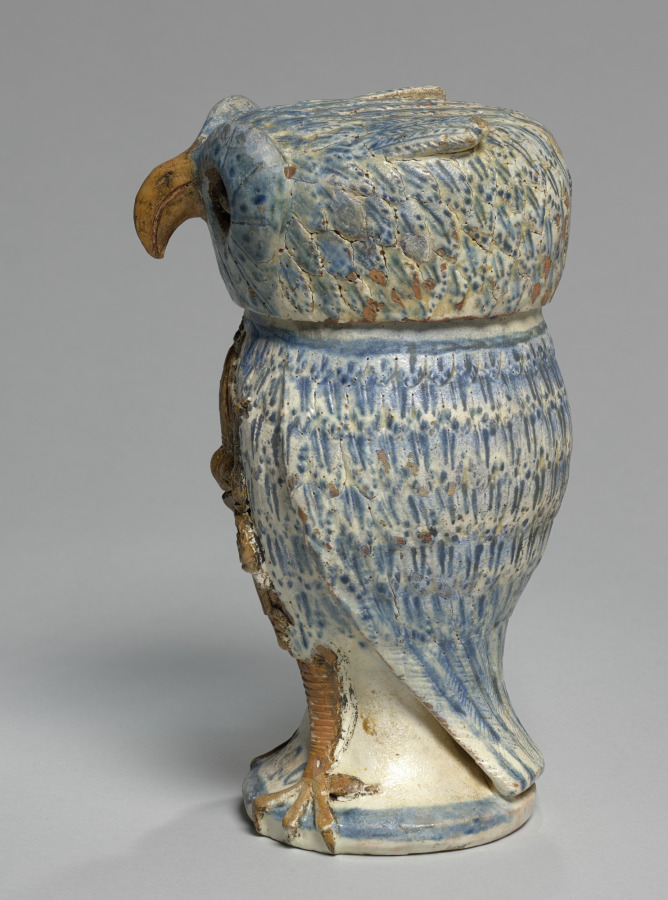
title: Owl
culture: Southern Germany, 16th century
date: 1540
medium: faience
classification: Ceramic